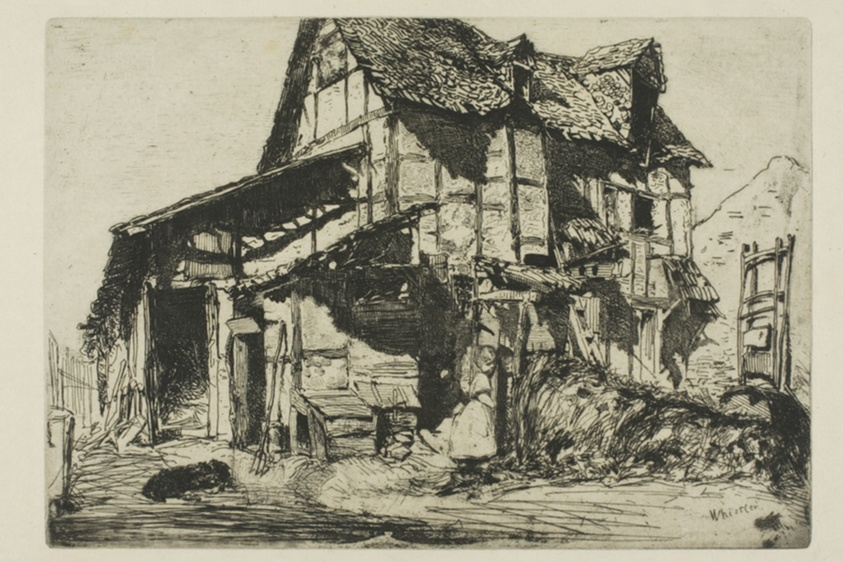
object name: Print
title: The Unsafe Tenement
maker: James McNeill Whistler (American, 1834-1903)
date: 1858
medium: Etching with foul biting in black ink on cream Japanese paper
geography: United States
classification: etching; foul biting; print; prints and drawing; paper